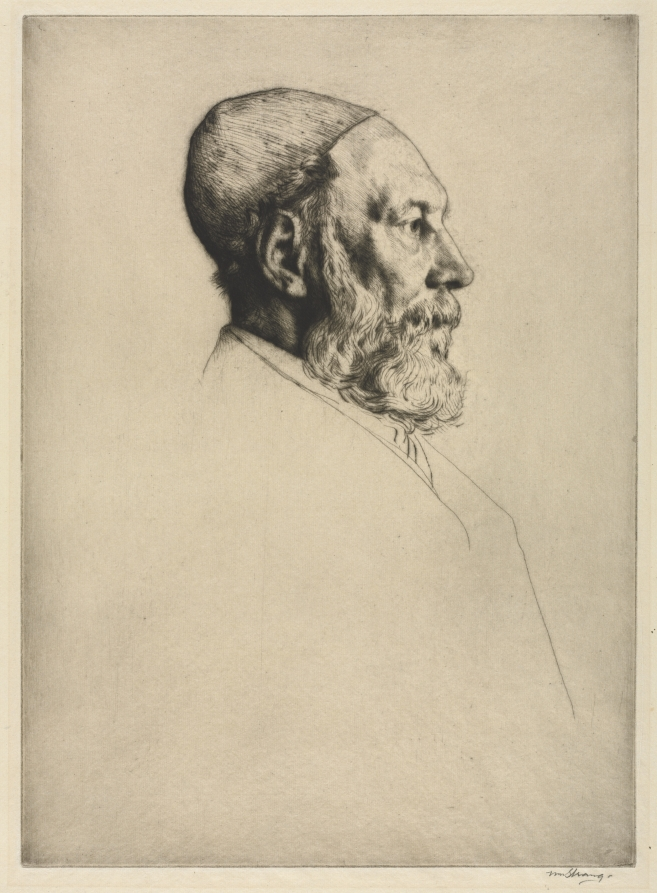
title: Frederick Goulding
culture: England, 20th century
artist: William Strang (British, 1859–1921)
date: 1906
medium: drypoint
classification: Print